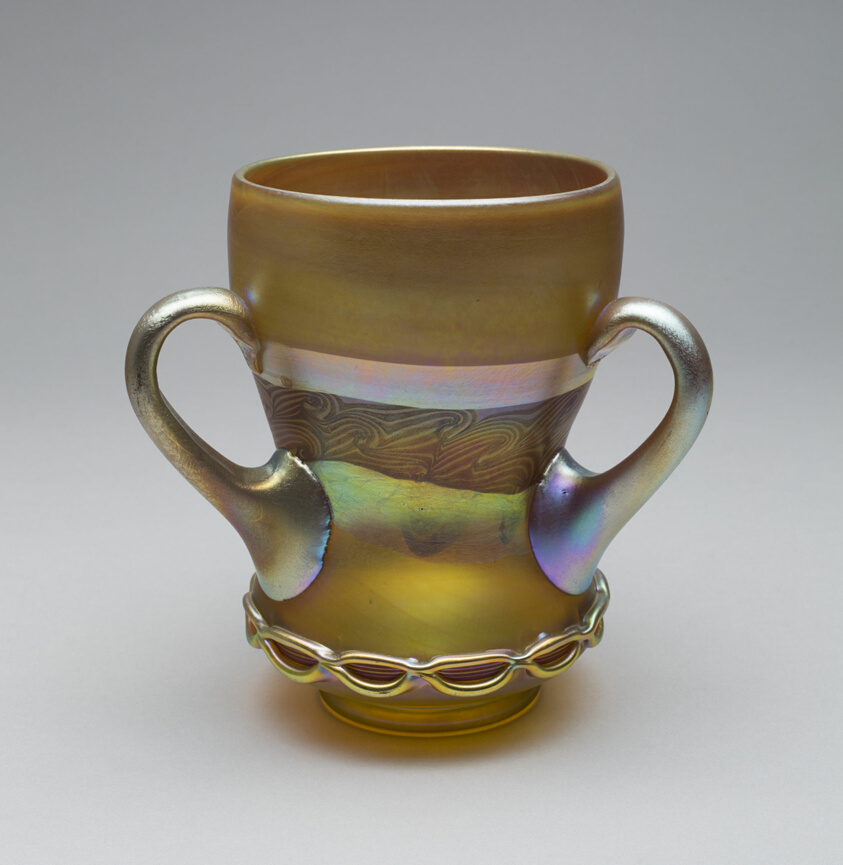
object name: Glass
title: Tyg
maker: Tiffany Glass and Decorating Company (American, 1894–1902); or Tiffany Studios (American, 1902–32); Corona, New York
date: 1900–20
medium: Favrile glass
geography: Corona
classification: drinking vessel; glass; american decorative arts; american arts; decorative arts